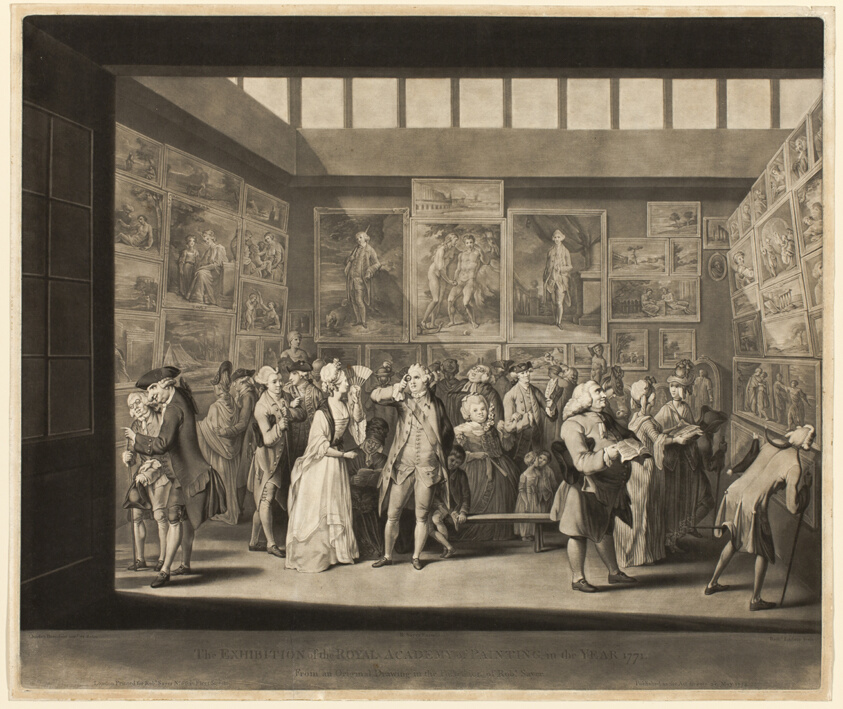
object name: Print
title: The Exhibition of the Royal Academy of Painting in the Year 1771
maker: Richard Earlom (British, 1743-1822); after Michel Vincent Brandoin, called l'Anglais (Swiss, 1733-1790)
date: published May 20, 1772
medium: Mezzotint in black on cream laid paper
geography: England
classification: mezzotint; print; prints and drawing